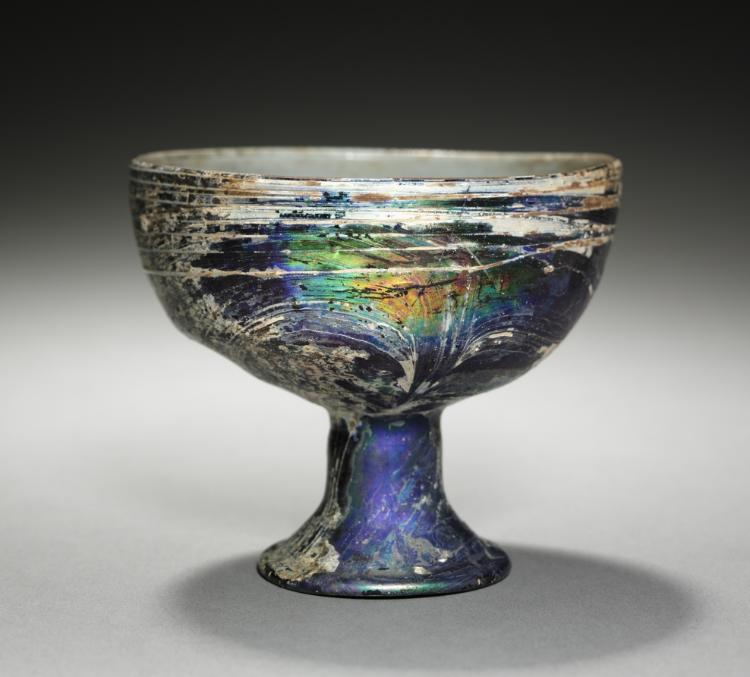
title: Chalice (?)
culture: Italy, Roman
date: 100–300 CE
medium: glass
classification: Glass